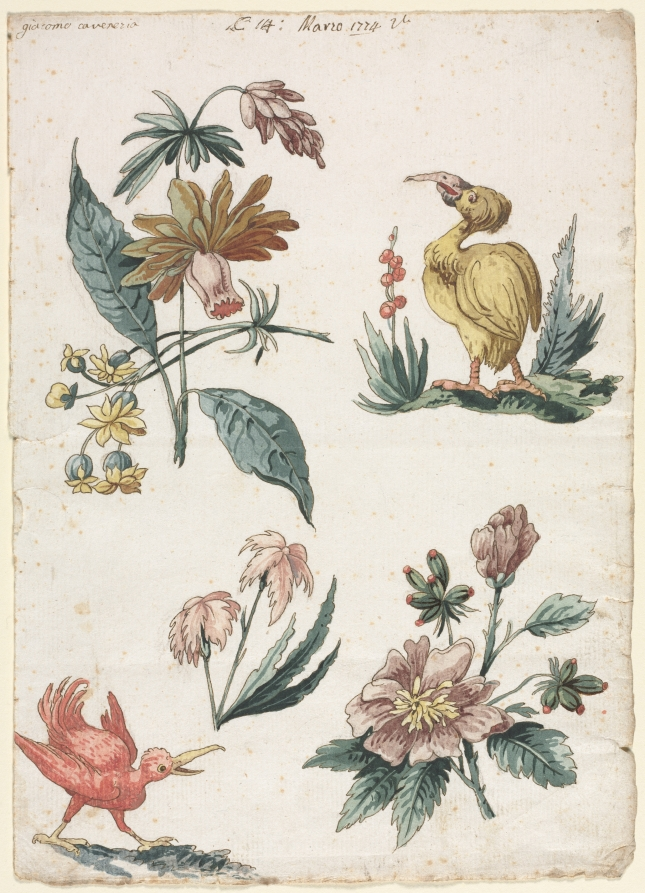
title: Floral Designs with Two Birds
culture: Italy, 18th century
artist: Giacomo Cavenezia (Italian)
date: 1774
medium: pen and brown ink, brush and brown wash, gouache and watercolor, over traces of black chalk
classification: Drawing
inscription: signed, upper left, in brown ink: giacomo cavenezia ; by artist, upper center, in brown ink: [illegible] 14: Marzo 1774 [1774 is underlined] ; upper center, in brown ink: [26?]